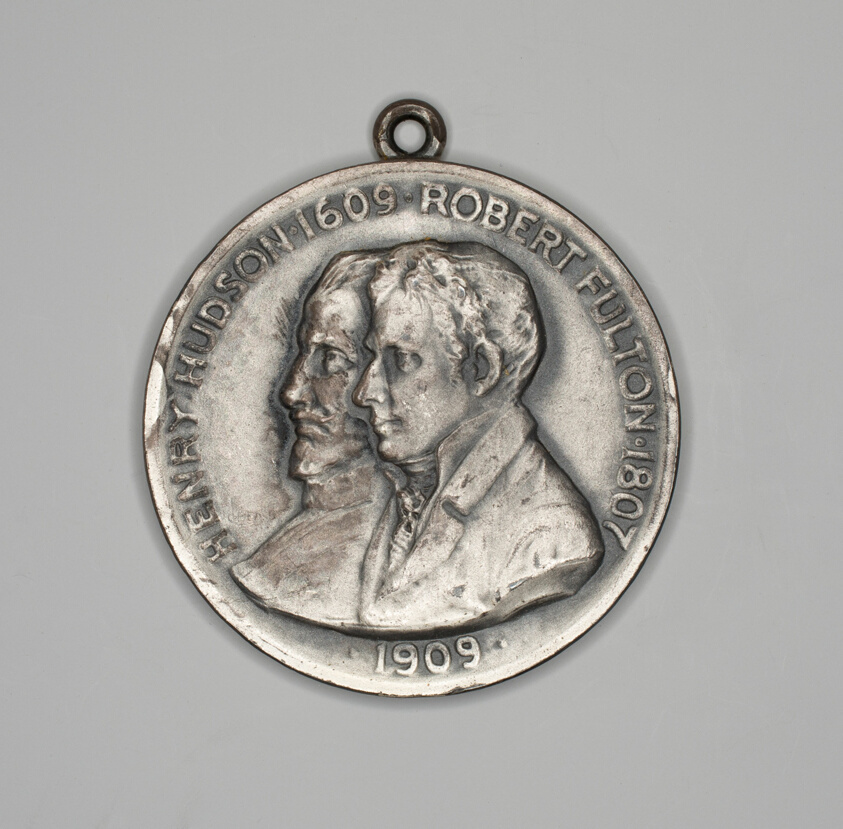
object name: Metalwork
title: Two Medals Commemorating the Hudson-Fulton Celebration New York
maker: Artist unknown (American, 20th century)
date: 1909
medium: Silver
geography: New York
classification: medal; american arts; decorative arts